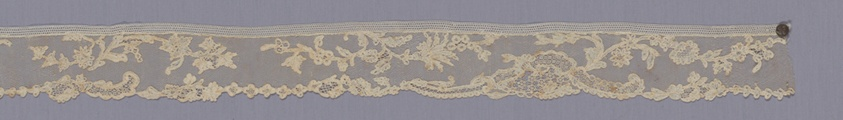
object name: Textile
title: Border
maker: France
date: 1750s/60s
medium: Linen, needle lace of a type known as "Point d'Alençon"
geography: France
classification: textile; lace - needle; lace